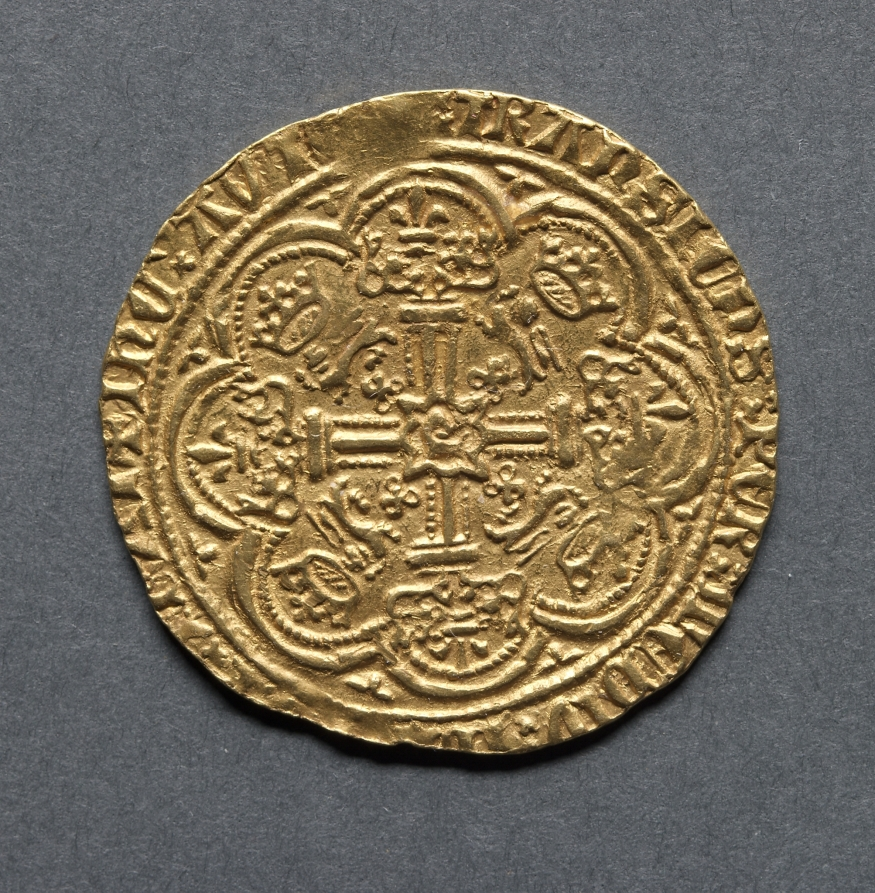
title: Noble: Ornamental Cross with Lis Terminals (reverse)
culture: England, Richard II, 1377-1399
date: 1377–1399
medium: gold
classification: Coins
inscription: IHC. AVTEM TRANSIENS PER MEDIV. ILLORVM IBAT